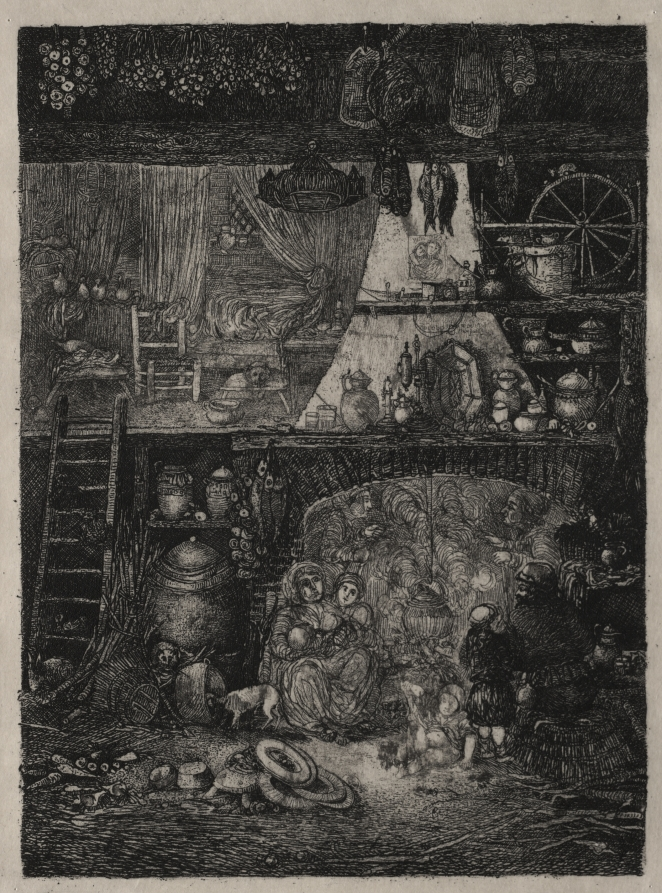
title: Peasant Interior in the Haute-Garonne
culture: France, 19th century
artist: Rodolphe Bresdin (French, 1822–1885)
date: 1858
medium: etching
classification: Print